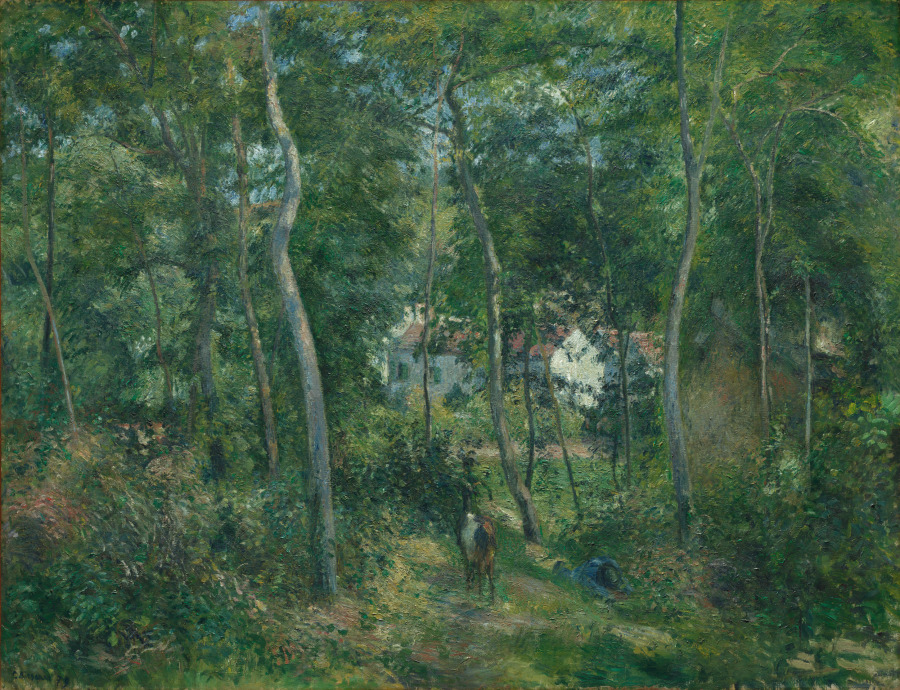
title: Edge of the Woods Near L'Hermitage, Pontoise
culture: France, 19th century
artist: Camille Pissarro (French, 1830–1903)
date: 1879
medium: oil on fabric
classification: Painting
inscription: Signed lower left: C. Pissarro 79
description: Born to a French-Jewish family on St. Thomas island in the Caribbean, Pissarro painted this monumental landscape when he was desperately poor and struggling to sell his paintings. It depicts a man slumbering in the sun-dappled backwoods of the Hermitage, a rural village near Pontoise, where the artist had been living since 1872. Restricting his palette to pure hues, Pissarro applied brushstrokes in systematic diagonal patterns, producing an effect that he likened to knitting. This canvas was included in the fourth Impressionist exhibition of 1879.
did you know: A goat seen from the back standing next to the figure in blue laying in the grass invites the viewer to step inside this serene and beautiful setting.